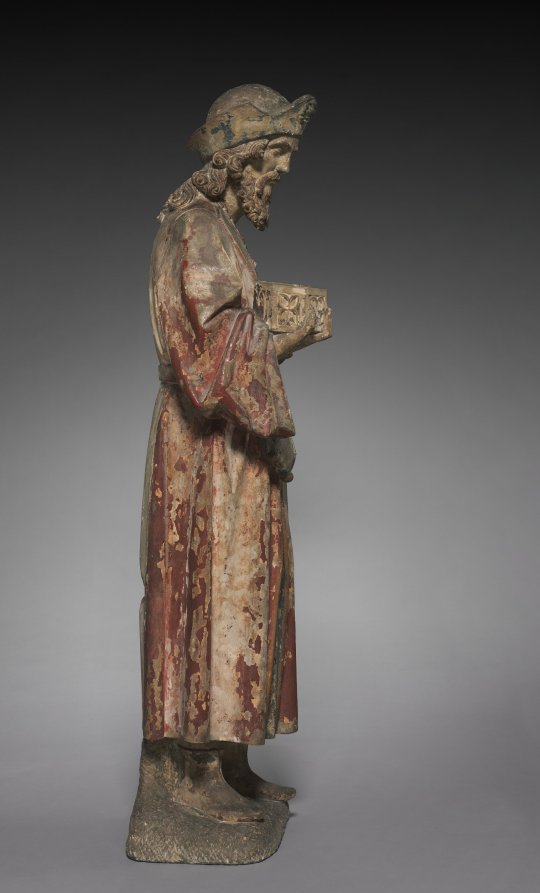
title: Magus from an Adoration Group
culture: France, possibly Champagne, 15th century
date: c. 1460–1475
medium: polychromed limestone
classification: Sculpture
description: This sculpture represents one of the three Magi or kings who witnessed the birth of Jesus. The Magi are identified as Caspar, Melchior, and Balthazar and are typically shown in art bearing their gifts of gold, frankincense, and myrrh. Joseph is often present in these scenes as are shepherds.The single figure shown here was originally part of a sculptural group with many figures. He is shown holding an ornate receptacle with lid. Other figures from the group are not known to have survived, and which Magus the sculpture was intended to represent cannot be clearly established.